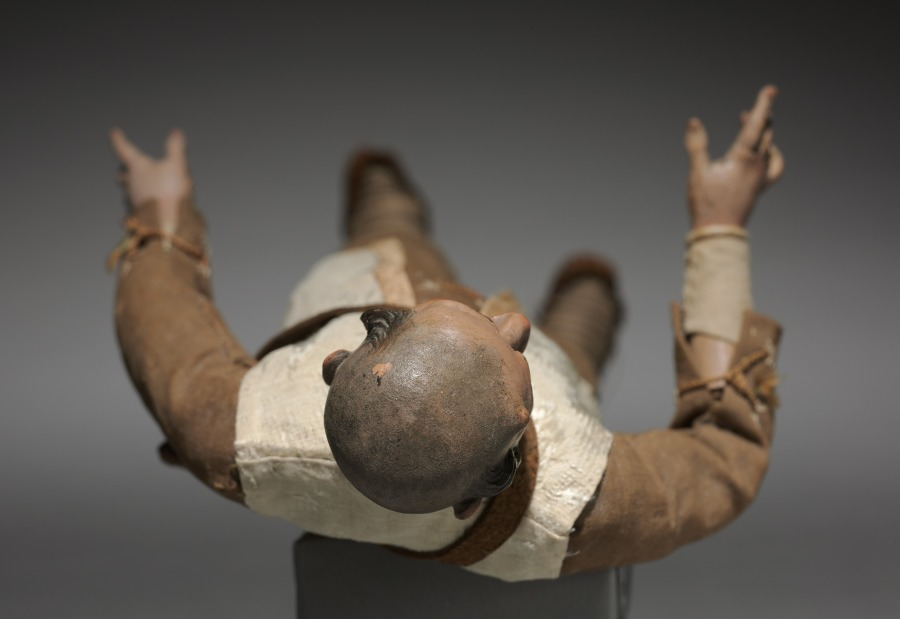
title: Figure from a Crèche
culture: Italy, Naples, late 18th-early 19th century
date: 1780–1830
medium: painted wood and terracotta with various textiles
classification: Sculpture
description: The practice of creating scenes of the Nativity for the home dates from the early 1700s in Italy, where people began to set up doll-like figures of about a foot or less in height. The custom was particularly popular in Naples around 1800, where crèche scenes (crèche means cradle, or crib) included many figures, whose heads and hands of painted terracotta, stuffed cloth bodies, and clothing adapted from contemporary local costumes gave them an amazingly realistic character. Representations of the birth of Jesus can be traced to the first few centuries of Christianity. Both living creatures and sculptural depictions of them were used from early times. By the late middle ages it was customary to create life-size figures of wood or stone, naturalistically painted, to represent the characters who participated in the events of Jesus's early life. These sculptures were then arranged in scenes illustrating one or both of the most important of these events, the Adoration of the Shepherds and the Adoration of the Magi-the three kings from the East who came to pay homage to the Christ child. Used in churches, these large figures were especially popular in Italy, Central Europe, Spain, and Portugal.